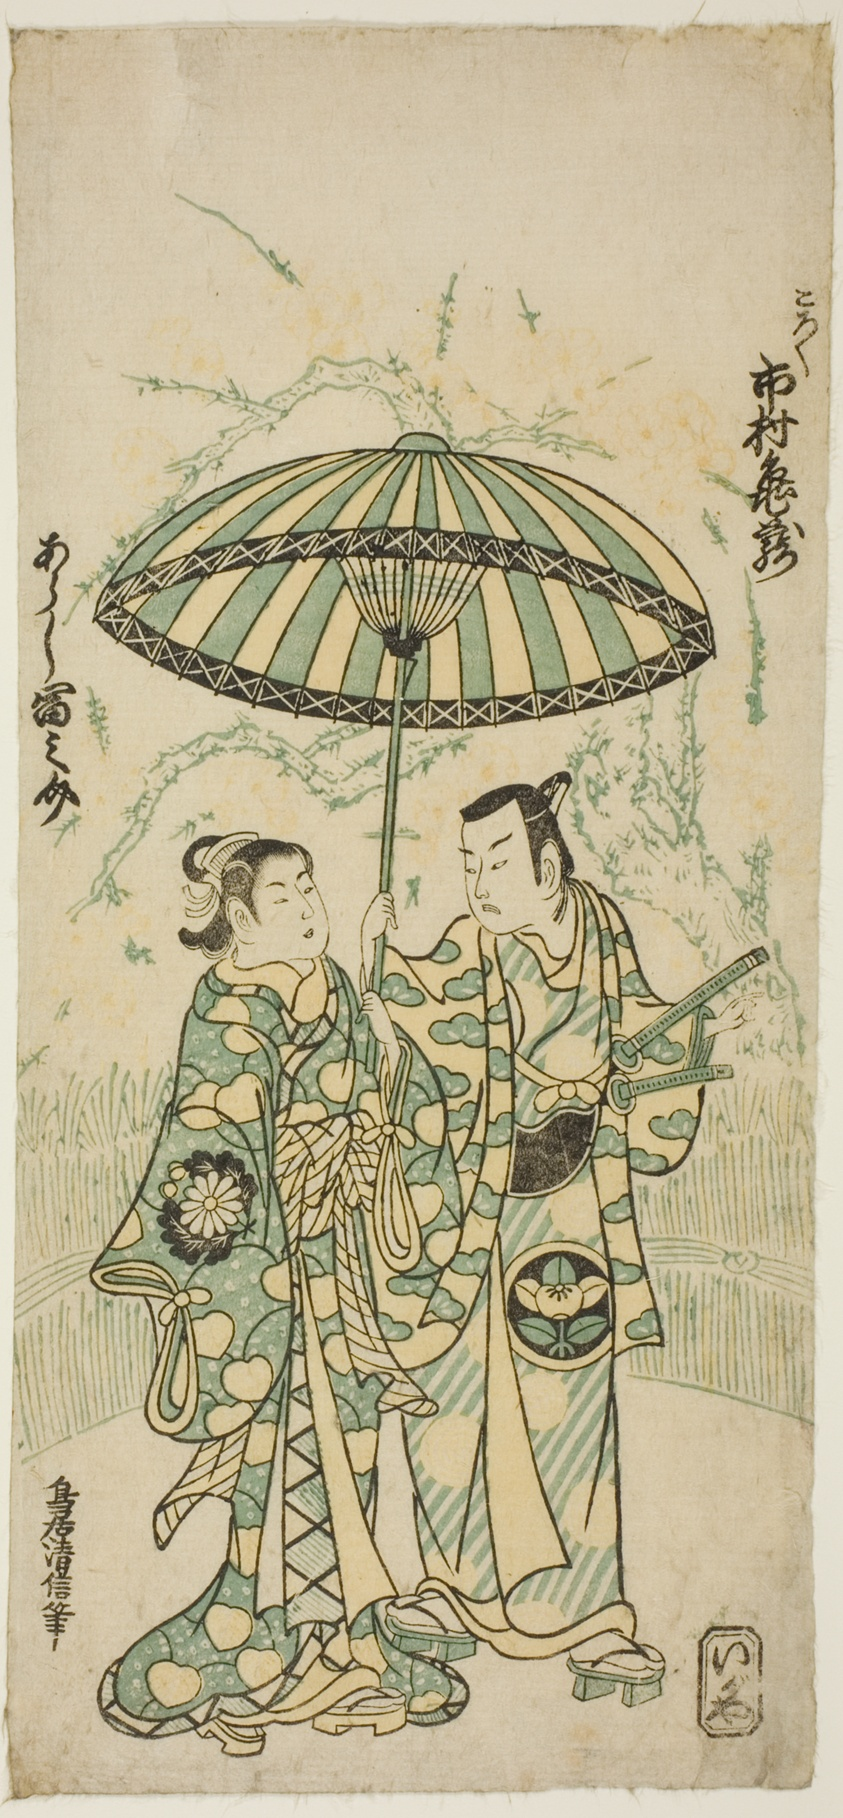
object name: Print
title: The Actors Ichimura Kamezo I as Kanto Koroku and Arashi Tominosuke I as Hayasaki in the play "Hokazo Yunzei Hachinoki," performed at the Ichimura Theater in the eleventh month, 1748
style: Japanese (culture or style)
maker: Torii Kiyonobu II (Japanese, active c. 1725-61)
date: 1748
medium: Color woodblock print; hosoban, benizuri-e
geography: Japan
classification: woodblock print; print; asian art